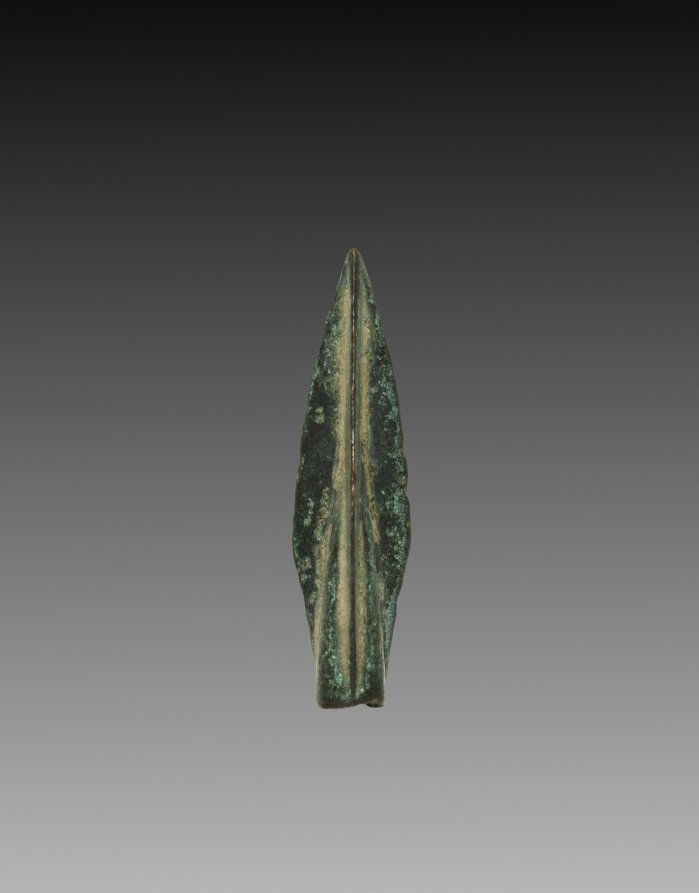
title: Arrow Point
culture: Iran, Ecbatana (?)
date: 550–330 BCE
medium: bronze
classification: Metalwork